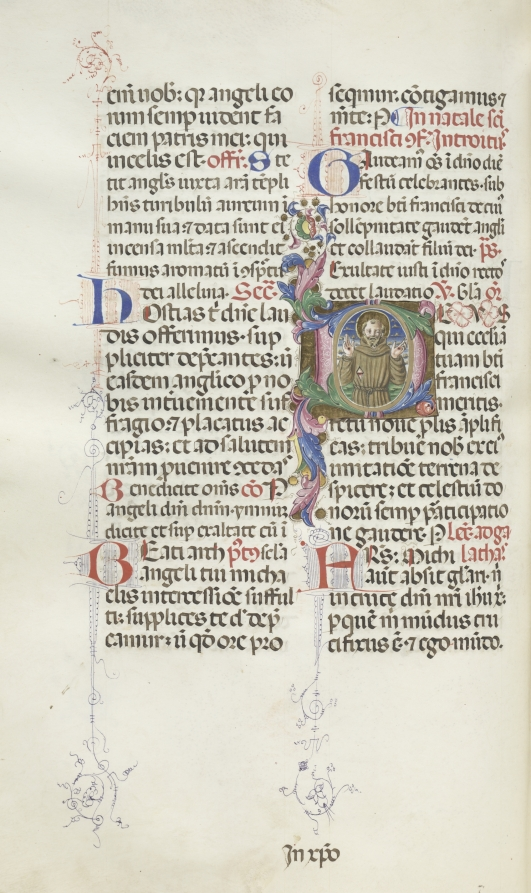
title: Missale: Fol. 318v: Saint Francis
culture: Italy, Perugia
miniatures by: Bartolommeo Caporali (Italian, c. 1420–1503)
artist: assisted by Giapeco Caporali (Italian, d. 1478)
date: 1469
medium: ink, tempera and burnished gold on vellum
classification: Bound Volume